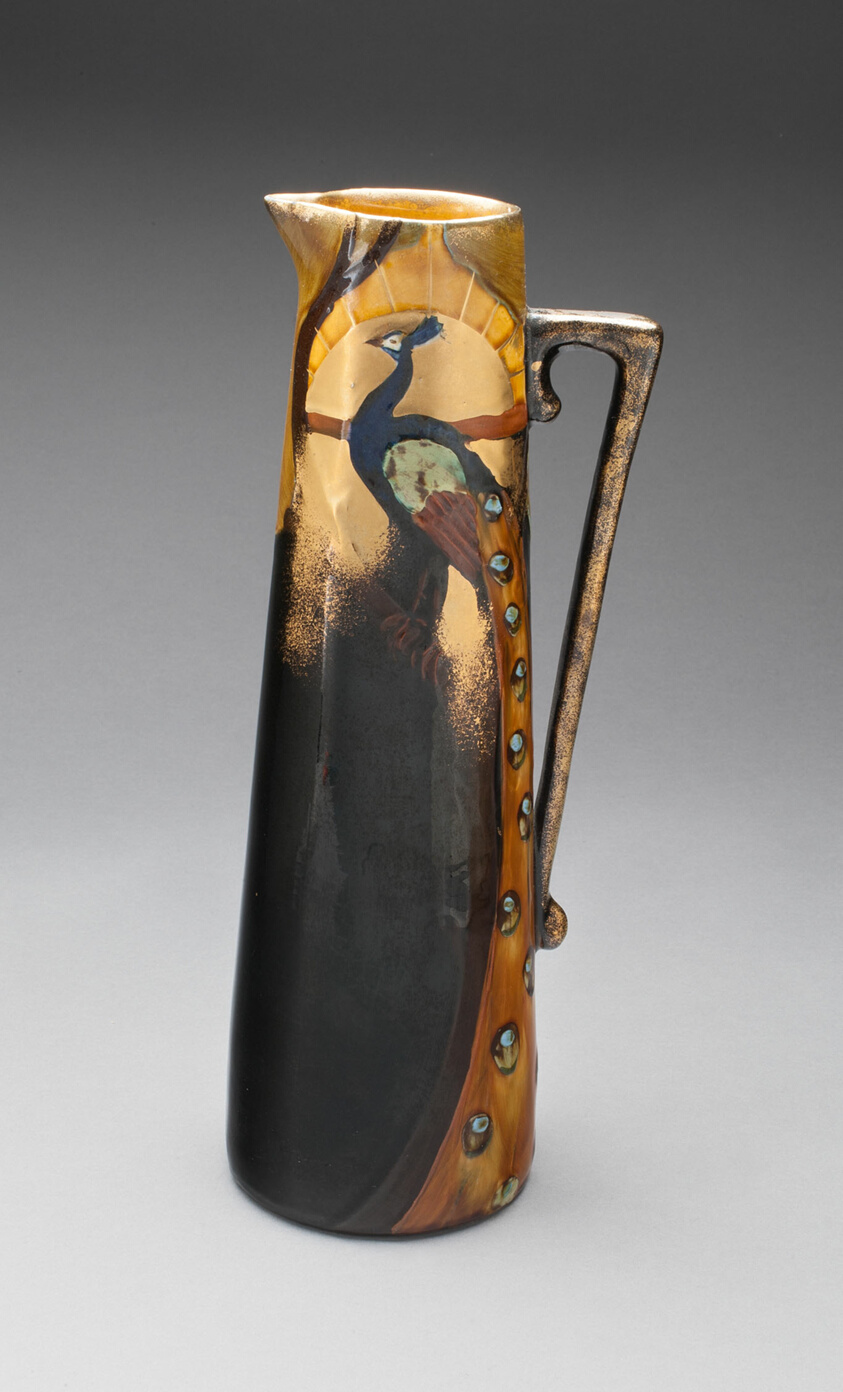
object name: Ceramics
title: Ewer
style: Art Nouveau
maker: Manufactured by Phoenix Ware; Designed by Thomas Forester and Sons; English, 1883-1959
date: c. 1900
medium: Lead-glazed earthenware, gilded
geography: England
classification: ewer (vessel); vessel; european decorative arts; ceramics; earthenware